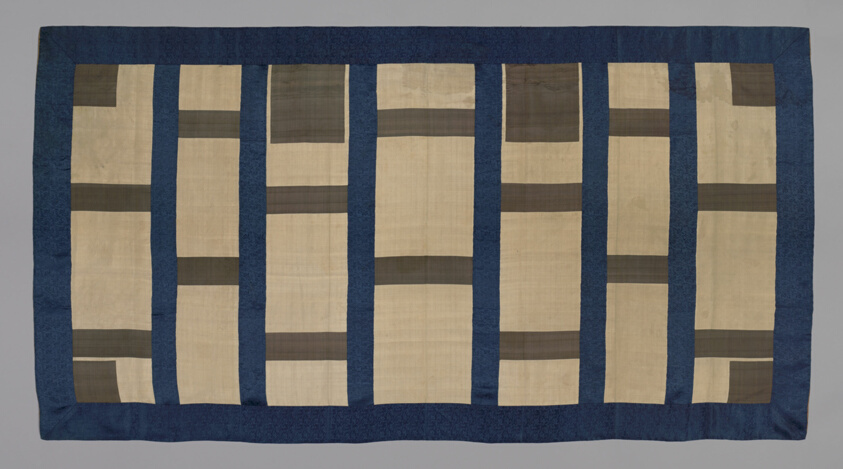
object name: Textile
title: Kesa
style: late edo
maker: Japan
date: Early or mid–19th century, Late Edo period (1789–1868)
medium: Silk, satin damask and plain weaves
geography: Japan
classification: textile; liturgical - buddhist; weaving